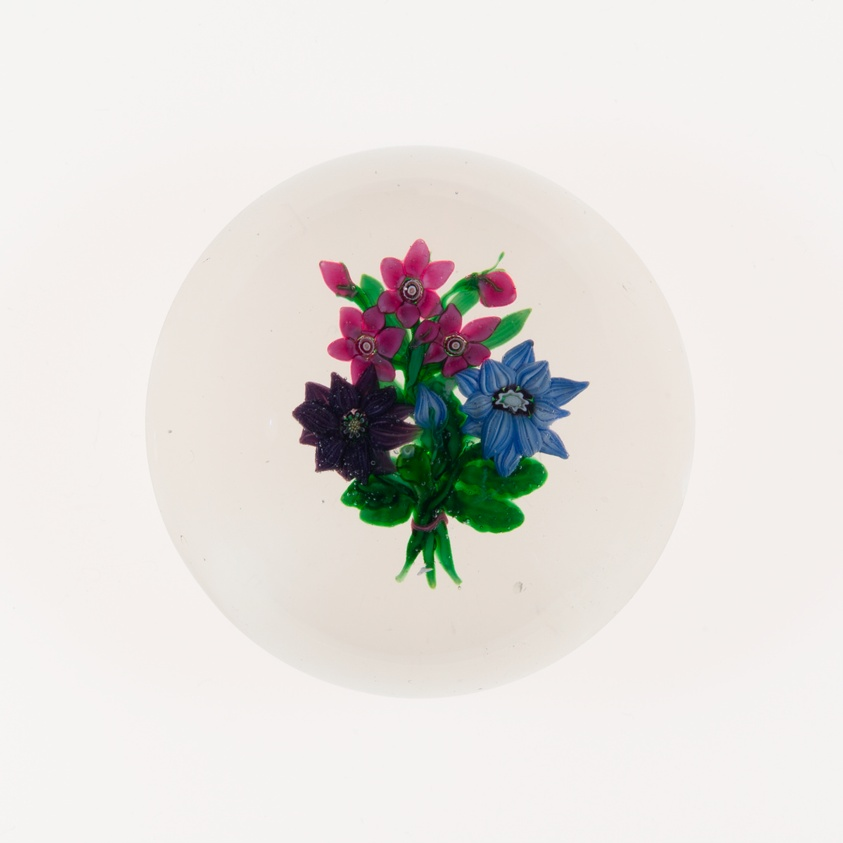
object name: Glass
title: Paperweight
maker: Clichy Glassworks (Cristalleries de Clichy); Clichy, France, 1837-1885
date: c. 1845/60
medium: Glass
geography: France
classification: paperweight; glass